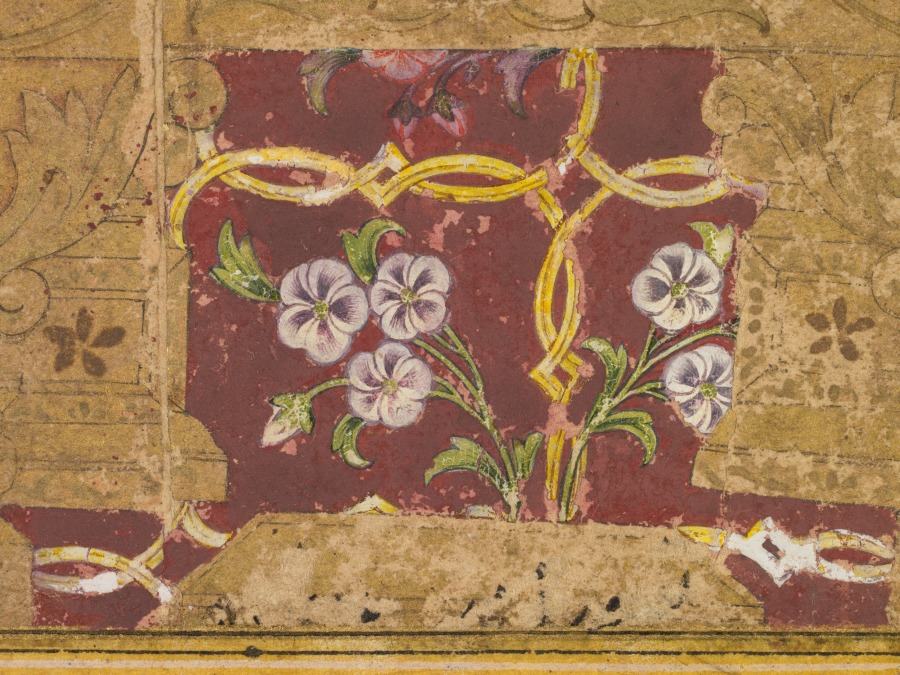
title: Posthumous portrait of Emperor Jahangir under a canopy (recto)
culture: India, Mughal, 17th century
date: c. 1650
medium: Gum tempera, ink, and gold on paper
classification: Painting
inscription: recto: inscription of identification in upper border, partially erased inscription at lower edge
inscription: Persian inscription above, in inner border, in nasta‘liq script: Great King Jahangir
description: Jahangir, the fourth Mughal emperor, was remembered for his greatness long after his death. Ruling from 1605 to 1627, he laid the foundations for long-term trade and diplomatic relations with various nations of Europe, most notably England and Portugal. He oversaw the transition of Mughal India into a global power during a time that can be considered the international Age of Exploration. This posthumous portrait depicts Jahangir amid the trappings of wealth and power with the light of divine sanction shining behind his head. A white marble railing demarcates his imperial space.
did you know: Jahangir holds a ruby or spinel, thought to be a talisman for military victory.